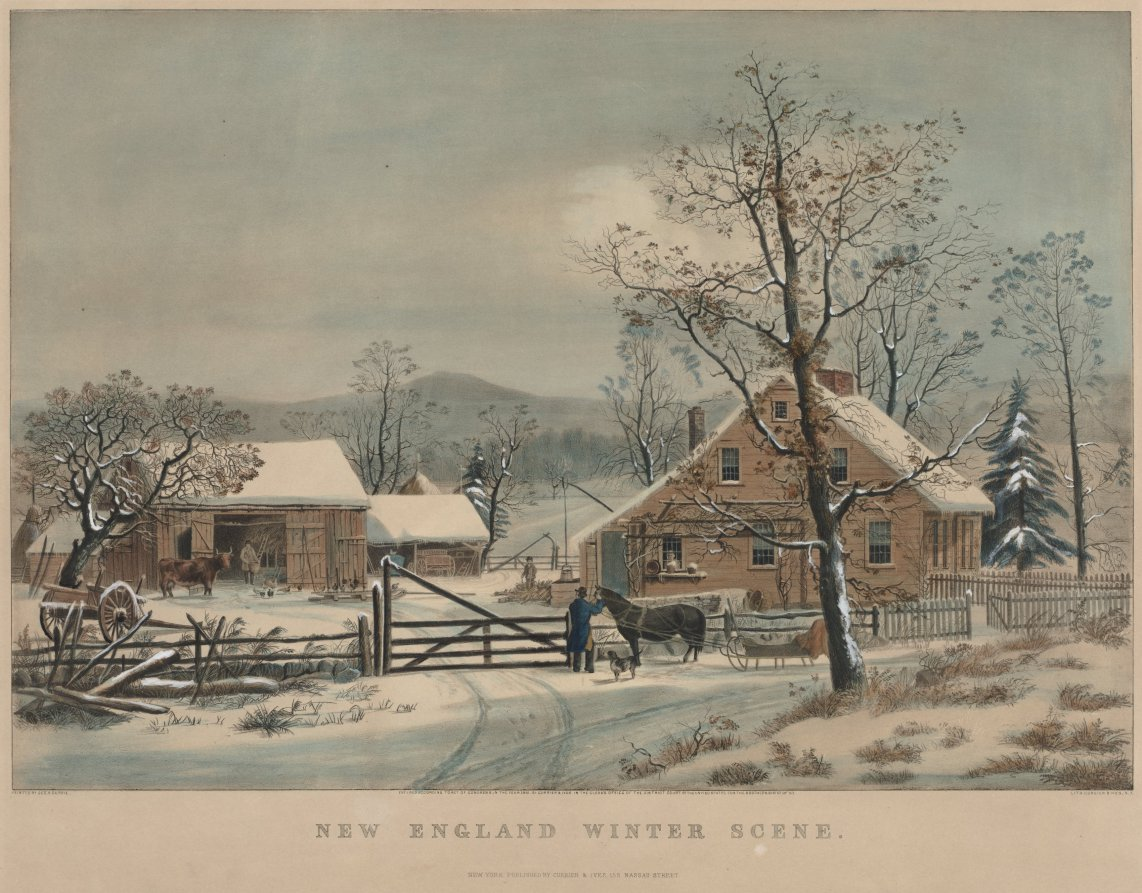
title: New England Winter Scene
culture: America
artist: and James Merritt Ives (American, 1824–1895)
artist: Nathaniel Currier (American, 1813–1888)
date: 1861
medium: lithograph, hand colored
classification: Print